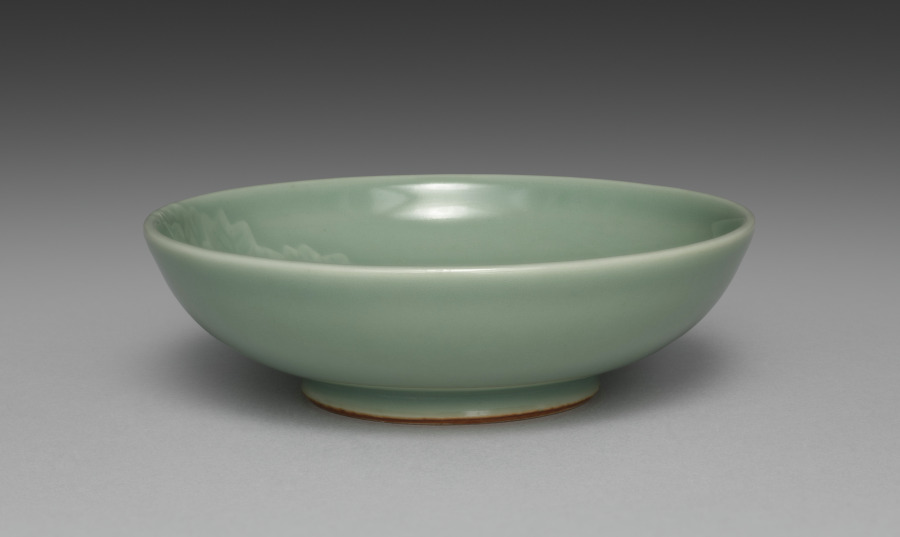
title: Dish from Dishes with Ivy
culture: Japan, Meiji period (1868–1912)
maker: Seifū Yohei III (Japanese, 1851–1914)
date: 1893–1914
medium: One from a set of five dishes; porcelain with green glaze and molded designs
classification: Ceramic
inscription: 清風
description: Yohei III’s main output for his sophisticated clientele was in the form of tea sets and dining sets. He often produced in pairs, sets of five, or sets of ten. This set of five dishes with a green glaze and designs of ivy vines in very low relief has unfortunately lost its box. These dishes are slightly larger than the other dishes, like CMA 2022.187, and so may have been not saucers but rather small plates for meals.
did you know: In his career, Seifū Yohei III created a range of dishes in green glazes.